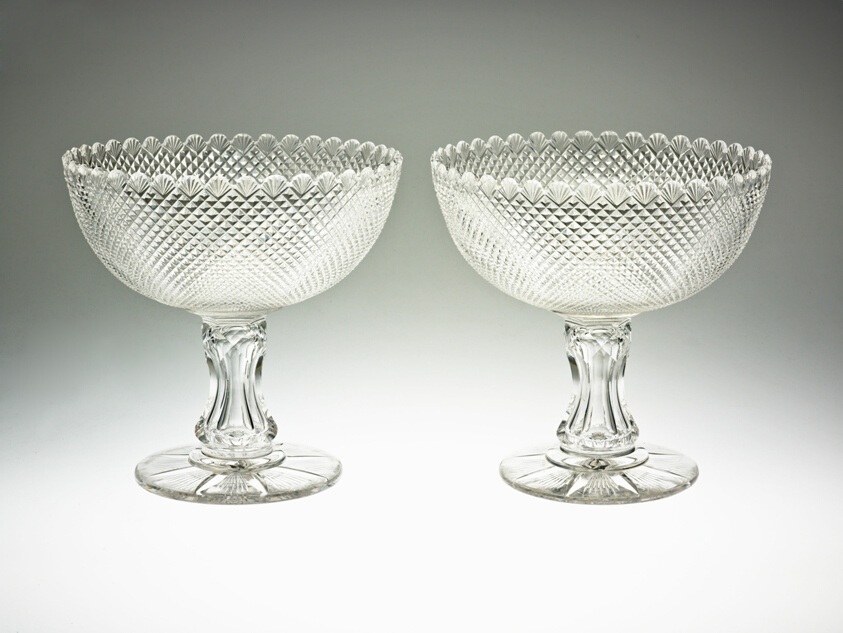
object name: Glass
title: Pair of Compotes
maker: Artist unknown (American, 19th century); New York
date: 1851–57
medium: Cut glass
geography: New York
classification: compote; american decorative arts; decorative arts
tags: dining, drinking